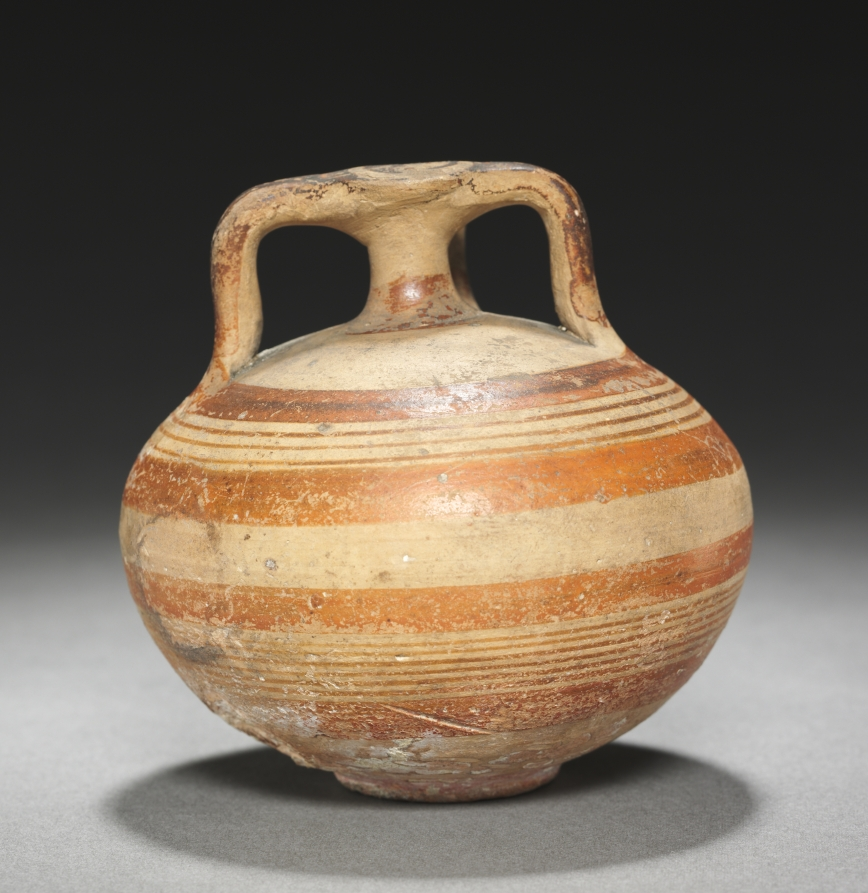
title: Miniature Stirrup Jar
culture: Cyprus, late Helladic III A2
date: c. 1350–1300 BCE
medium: Cypro-Mycenaean ware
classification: Ceramic